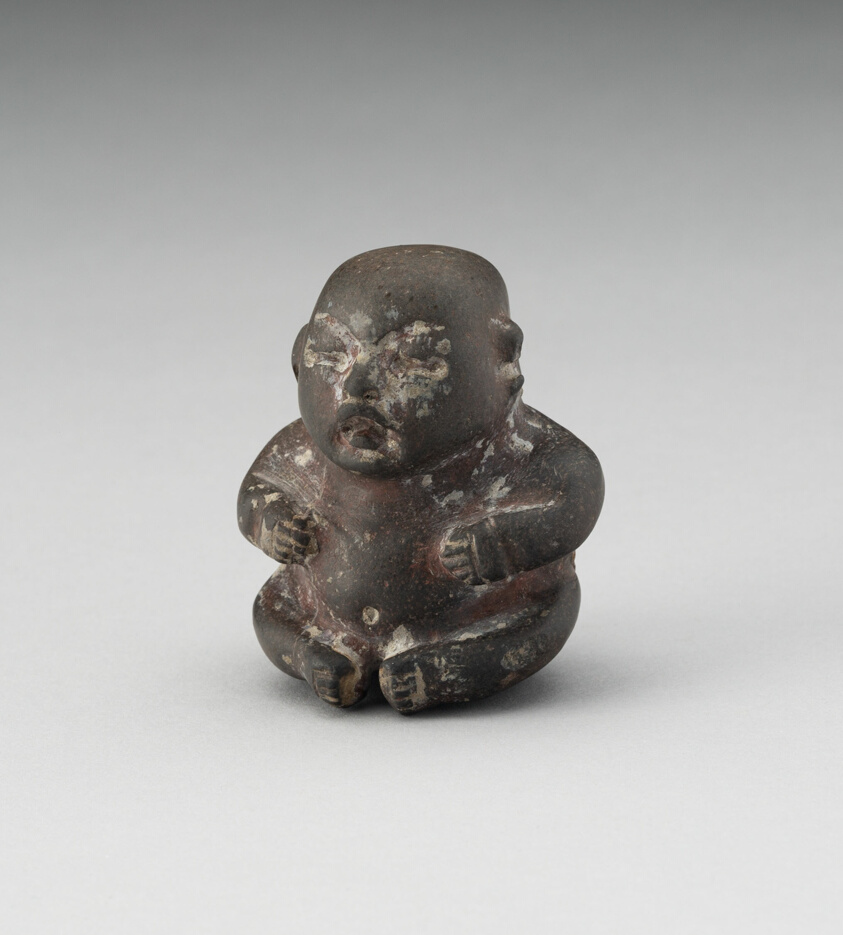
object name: Sculpture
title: Seated Figurine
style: middle preclassic, preclassic, mesoamerican, Pre-Columbian, americas, Arts of the Americas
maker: Middle pre-Classic, Olmec-style; Probably Central Mexico or Veracruz, Mexico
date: 900–500 BCE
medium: Stone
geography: Mexico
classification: stone; sculpture; art of the americas